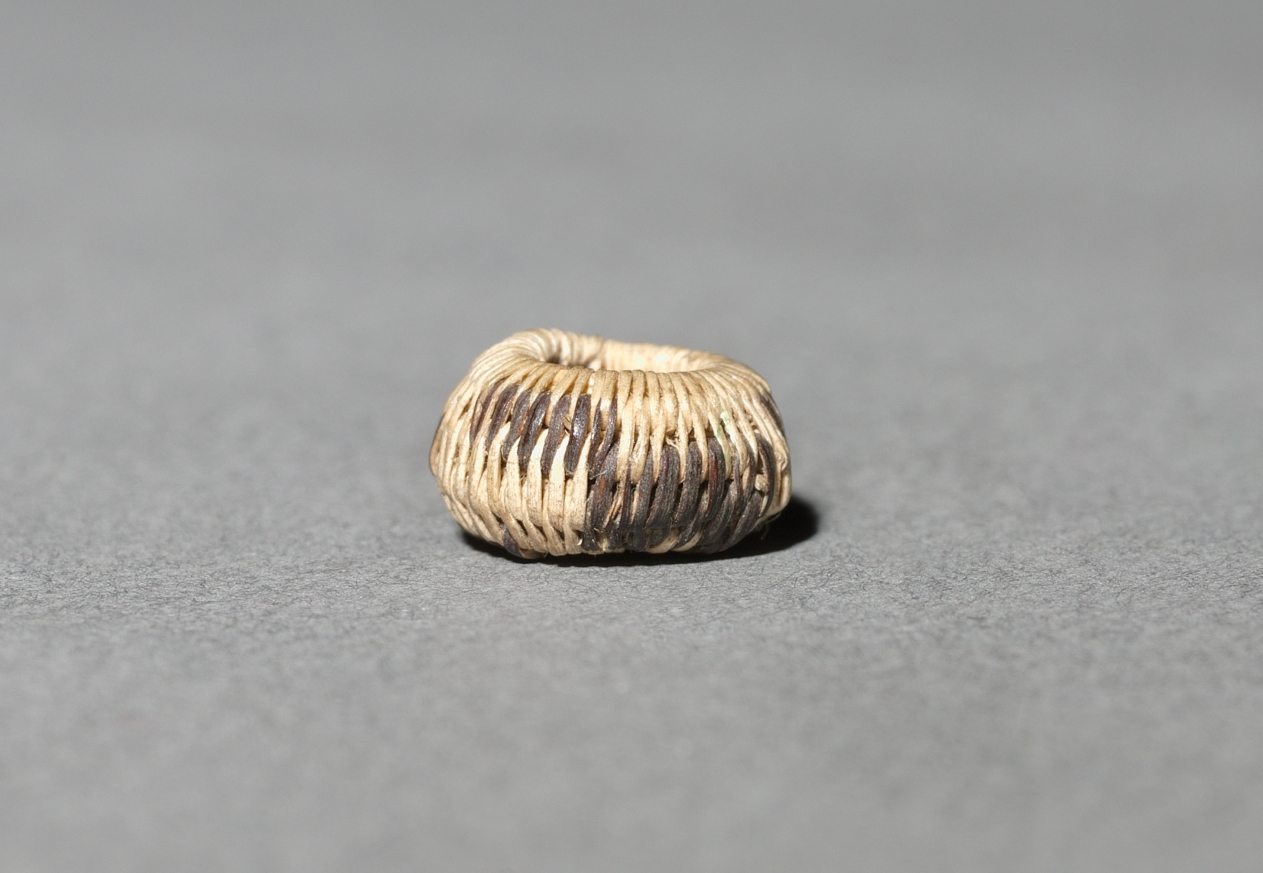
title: Miniature Round Basket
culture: California, Pomo, 20th century (?)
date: early 1900s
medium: coiled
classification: Basketry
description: Miniature baskets were made to demonstrate the basket maker’s virtuoso skill; these tiny marvels seem to be no exception—the smallest are just a few millimeters wide but still patterned. Such fine work required dexterity both in weaving and in harvesting and preparing the plant materials used to create the basket.